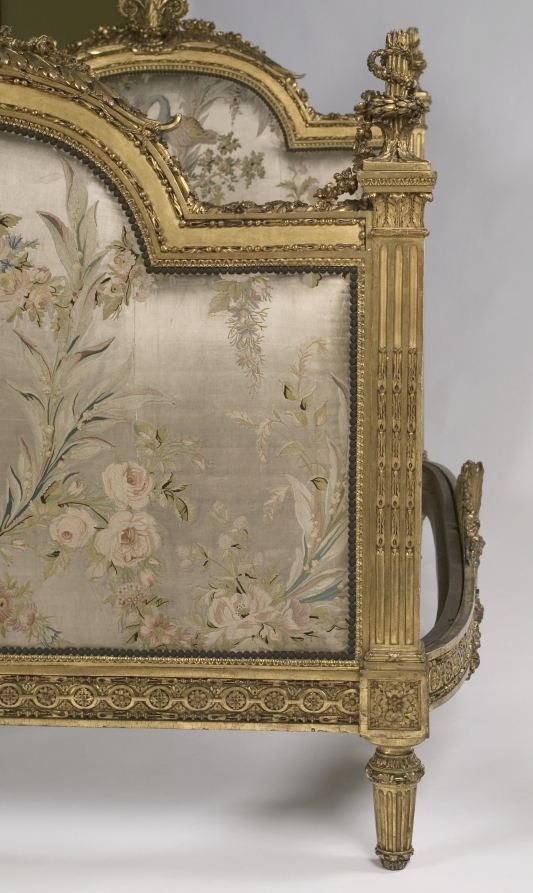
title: Bed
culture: France, 18th century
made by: attributed to Georges Jacob (French, 1739–1814)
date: 1700s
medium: gilded wood and embroidered satin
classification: Furniture and woodwork